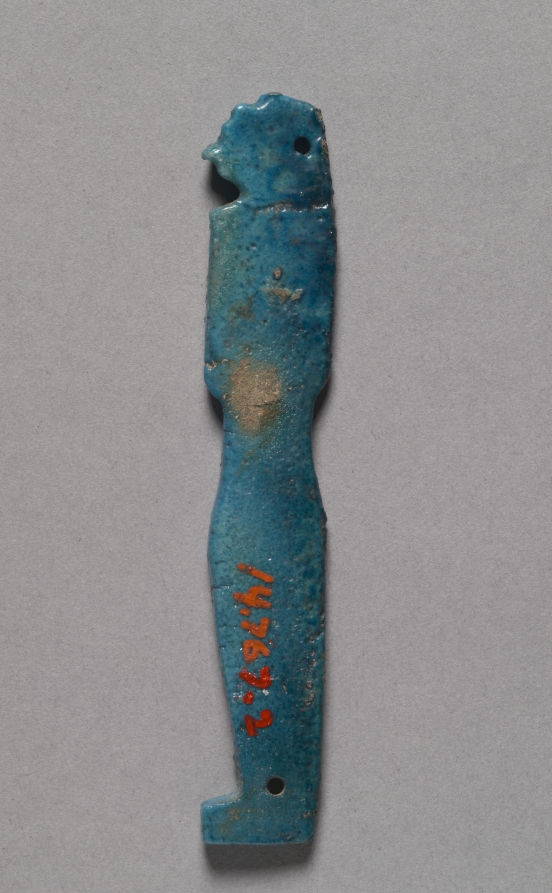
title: Son of Horus Amulet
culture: Egypt, Late period (715–332 BCE), Dynasty 26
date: 664–525 BCE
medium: bright turquoise faience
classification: Amulets